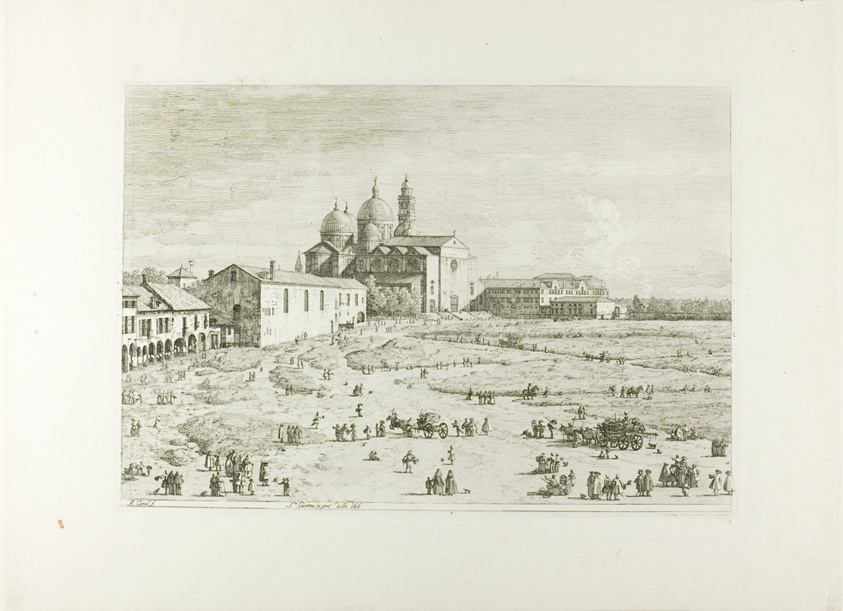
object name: Print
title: S. Giustina in prà della Vale, from Vedute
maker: Canaletto (Italian, 1697-1768)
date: 1735/44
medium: Etching in black on ivory laid paper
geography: Italy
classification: etching; print; prints and drawing